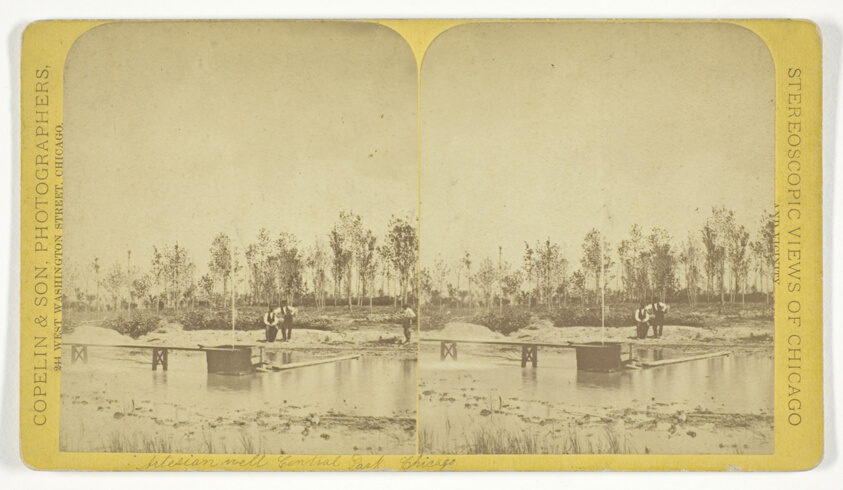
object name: Photograph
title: Artesian Well, Central Park, Chicago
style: 19th century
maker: Copelin and Son (American, active late 19th century)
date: c. 1873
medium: Albumen prints, stereo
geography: United States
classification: photography; photograph